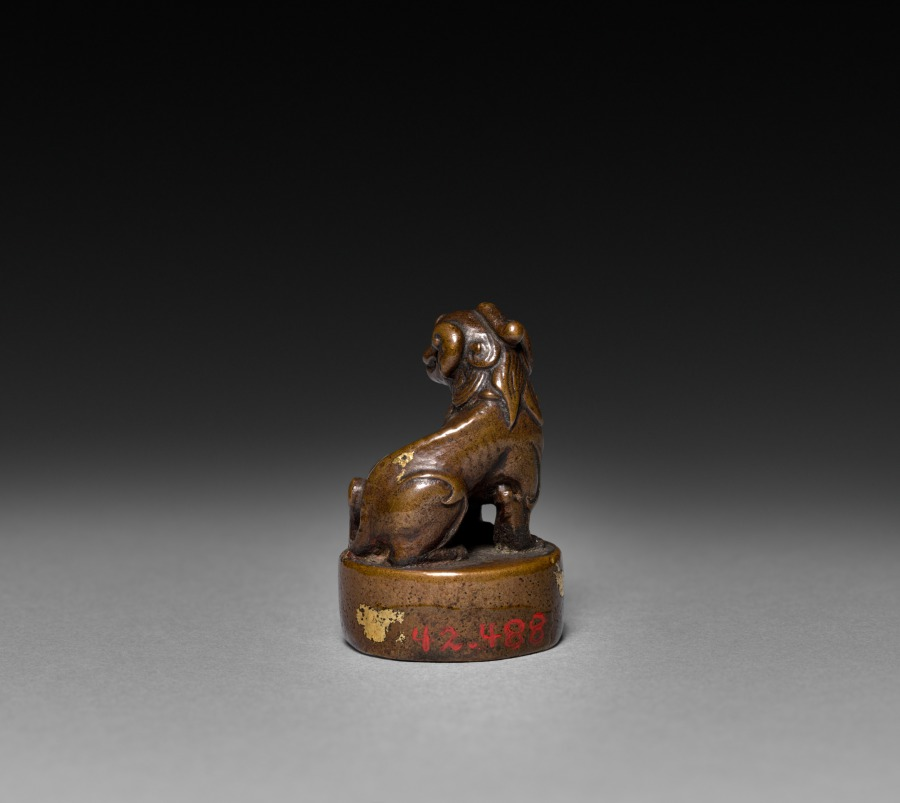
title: Seal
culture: China, Ming dynasty (1368-1644) or earlier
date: 1368– 1644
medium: bronze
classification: Metalwork